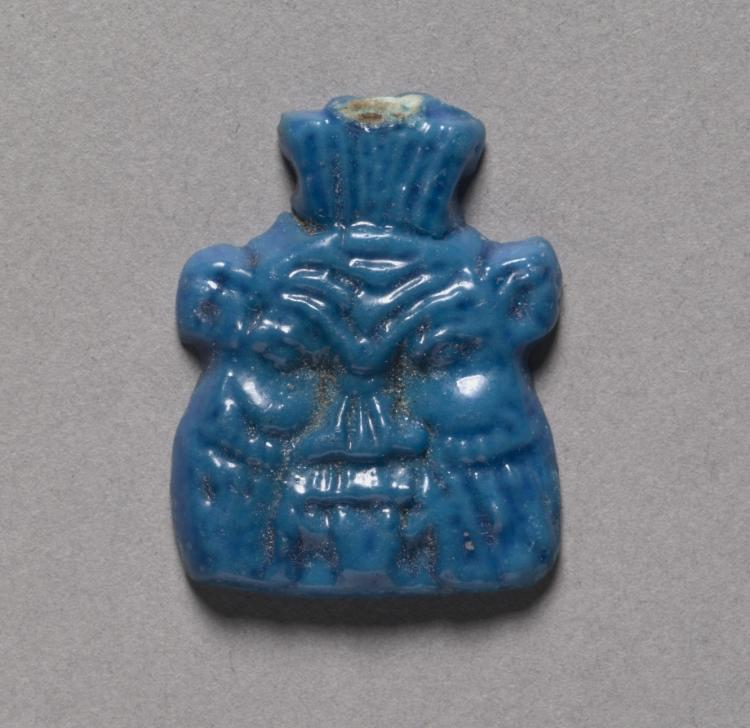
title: Bes Head Amulet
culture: Egypt, Third Intermediate (1069–715 BCE) or later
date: 1069–715 BCE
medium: turquoise blue faience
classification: Amulets